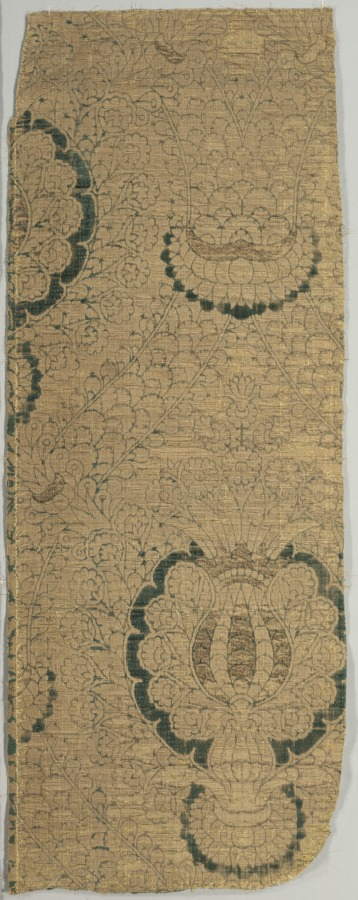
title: Velvet Fragments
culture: Spain, early 16th century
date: early 16th century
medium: velvet (cut, voided, and brocaded): silk and gold thread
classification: Velvet